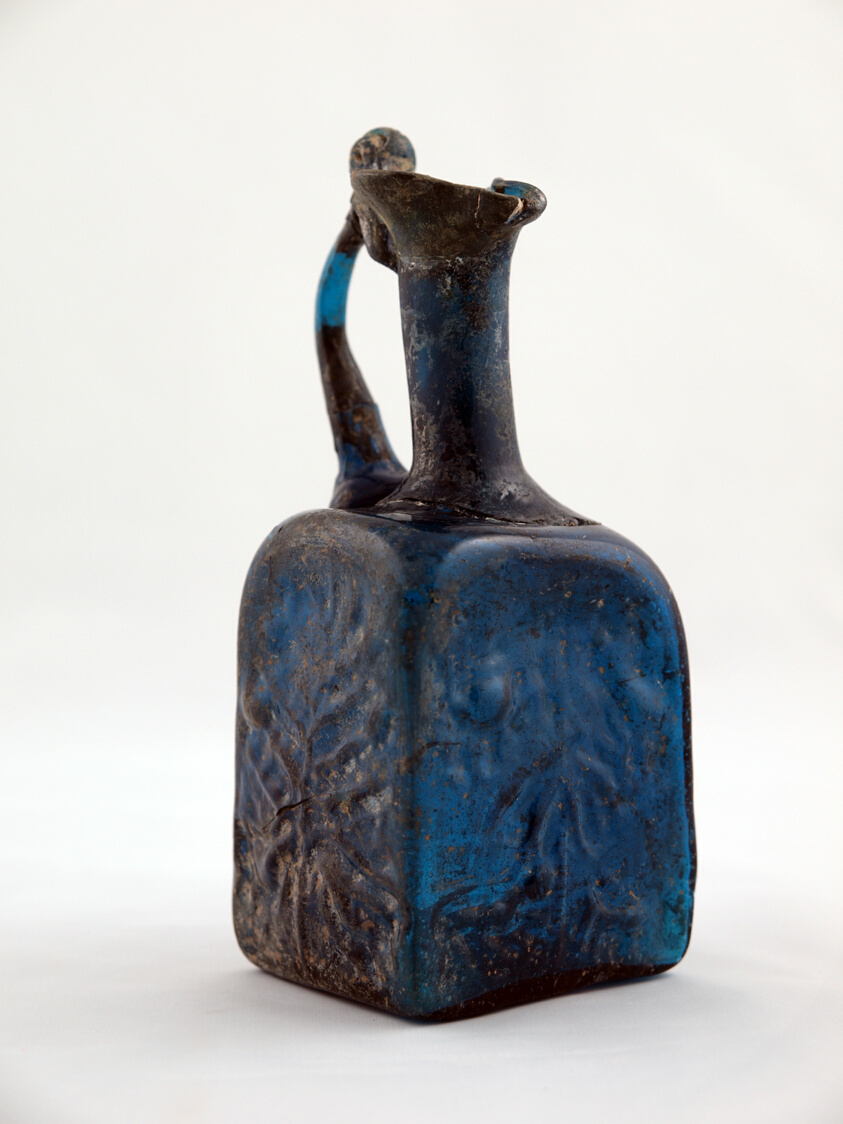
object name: Vessel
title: Jug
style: syrian, early christian, european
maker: Roman; Eastern Mediterranean, probably Syria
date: 4th century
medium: Glass, mold-blown technique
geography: Syria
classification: vessel; glass; ancient art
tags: vessels, religion